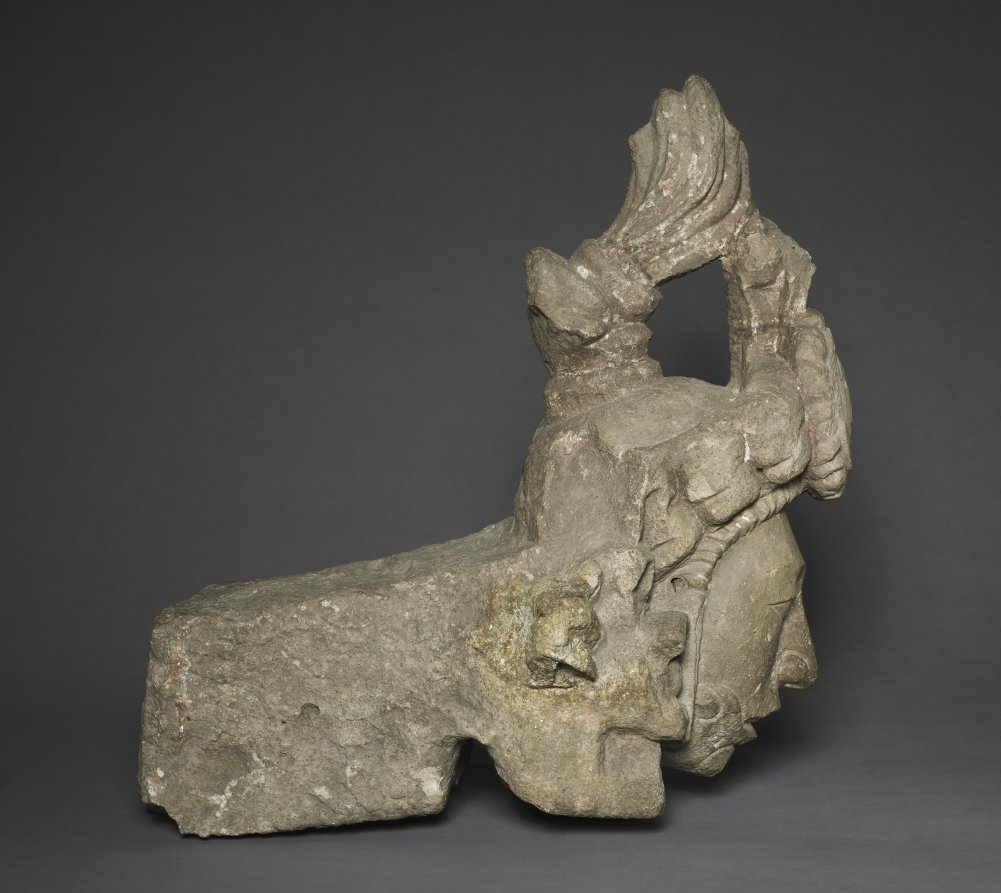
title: Head of a Young Noble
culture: Honduras, Copán, Structure 10L-22A, Maya style (250-900)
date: 746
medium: stone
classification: Sculpture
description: This young noble may be a political official of 8th-century Copán, an important site in eastern Maya territory. The noble, who embodies the Maya ideal of masculine beauty, wears circular ear ornaments and a headband, above which the tied hair rises. The meaning of the disembodied hand that cups the chin is debated. The head, collected by Harvard archaeologists in the 1890s, comes from the facade of a building may have been used as a council house by a Copán ruler and his advisors during a crisis that rocked the city’s ruling dynasty. On the structure’s upper level, above woven mat signs that symbolized political authority, eight figures were enthroned in T-shaped recesses. This head is from one of these figures. Beneath each recess was a hieroglyph thought to name an important town (or family) within Copán’s domain. The figures may represent these towns’ advisors to the king, whose image crowned the structure.